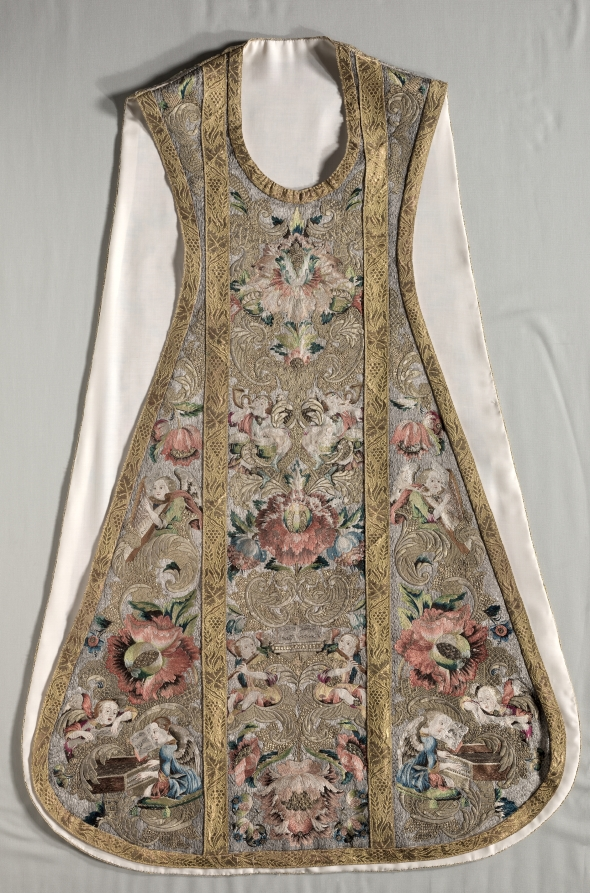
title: Chasuble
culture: Germany, Bavaria, last quarter of 17th century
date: 1675–99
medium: Silk and metallic threads on silk tabby sewn down on a linen tabby ground; embroidery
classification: Embroidery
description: This rare chasuble decorated with angels, musicians, pomegranates, and flowers represents Sacred and Profane Love. This is indicated by two figures—a clear-sighted figure embracing a blindfolded figure—standing on a globe in the upper center and also by the musicians. The angels play soft-sounding instruments (harpsichords, harps, viole da barccio, and flutes) while earthy figures play loud instruments (tambours and hunting horns). The chasuble was most likely part of a liturgical set commissioned for a wedding. This entire chasuble is embroidered with silk and metal thread laid over linen and stitched in place. The exceptionally fine workmanship, lavish use of gold and silver, and brilliant silk thread create this sumptuous vestment.